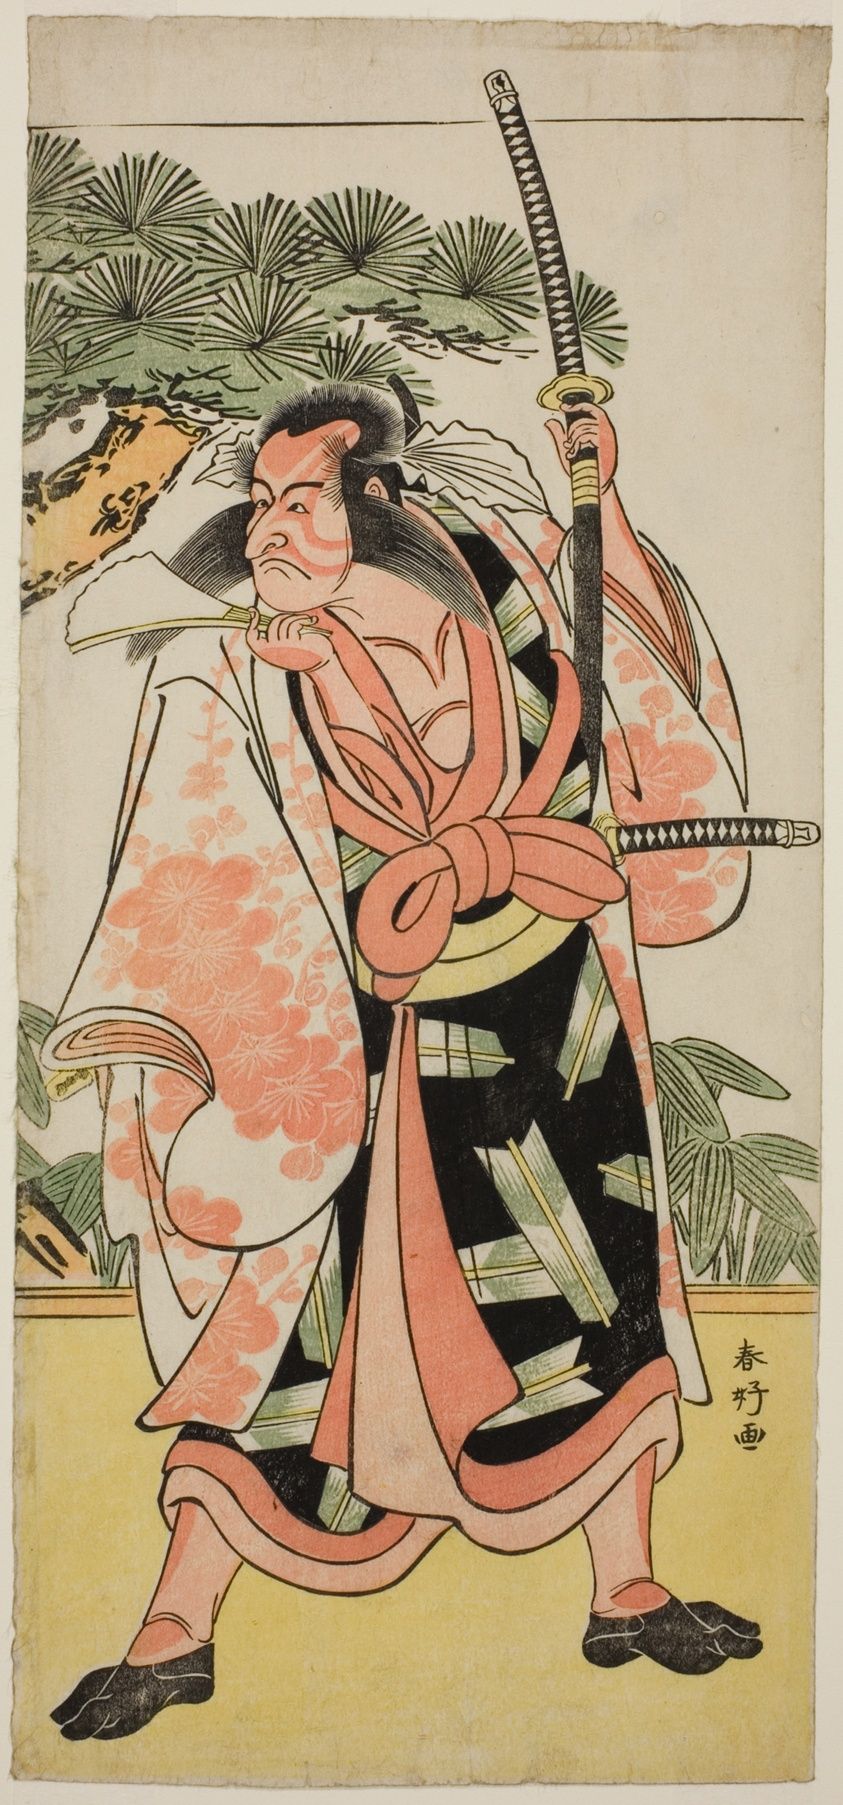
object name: Print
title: The Actor Ichikawa Danjuro V as Kajiwara Genta Kagesue in the Play Yuki Nazuna Saiwai Soga, Performed at the Kiri Theater in the First Month, 1787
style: Japanese (culture or style)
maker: Katsukawa Shunko I; Japanese, 1743-1812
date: c. 1787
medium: Color woodblock print; hosoban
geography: Japan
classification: woodblock print; print; asian art